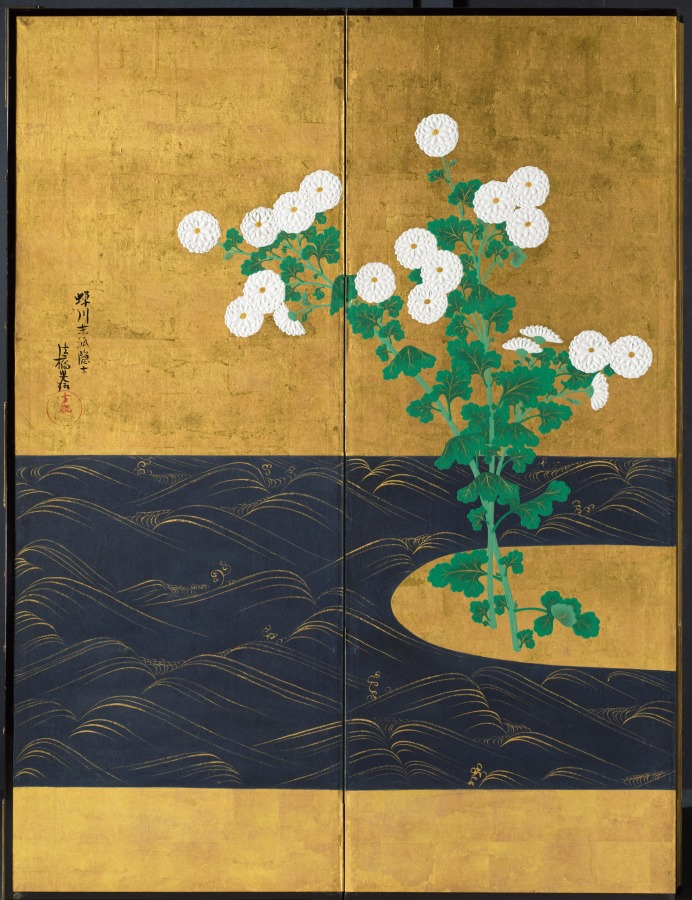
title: Chrysanthemums by a Stream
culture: Japan, Edo period (1615–1868)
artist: possibly by Ogata Kōrin (Japanese, 1658–1716)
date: c. 1715–30 or after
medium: One of a pair of six-panel folding screens; ink and color on gilded paper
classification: Painting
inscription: the signature and seal of Korin, "sensen mappa (makko) inshi hokyo Korin" (late generation hermit of the Kamo stream tradition) is written in two lines. A circular seal which reads "Hoshuku" is at the end of the second line on the edge of the first panel from the right.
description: These screens recall a painting style so closely identified with Ogata Kōrin (1658–1716) that it is called Rinpa, or “Rin School,” after the ideograph “rin” in his name. The highly stylized background accentuates floral groupings that have been groomed so as to appear utterly artificial, like the synthetic arrangements available today. Kōrin's genius derived in large measure from natural phenomena painstakingly observed and then manipulated to create compositions of startling refinement and sparkling isolation. This process may have grown out of Kōrin's early immersion in the family textile business, a medium that encourages such dramatic distillations of form: the stream's gold-crested waves bring to mind traditional kimono robe designs of Kōrin's era. Works with the signature seen on this painting, including a style name, or persona suggested to Kōrin by his brother Kenzan (1663–1743), are sometimes considered to have been produced either in the last year of his life, when he was very ill, or after his death. In both scenarios, the lion’s share of the work would have been done by studio assistants, but little is truly known of his studio practice. Given the regularity of the gold waves on the stream, and the tension in the arrangement of the chrysanthemums, it is also possible that the screens were made in emulation of Kōrin's designs by a later artist.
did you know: The signature used on these screens may indicate paintings made in the last year of the artist's life, or works completed by his studio after his death.